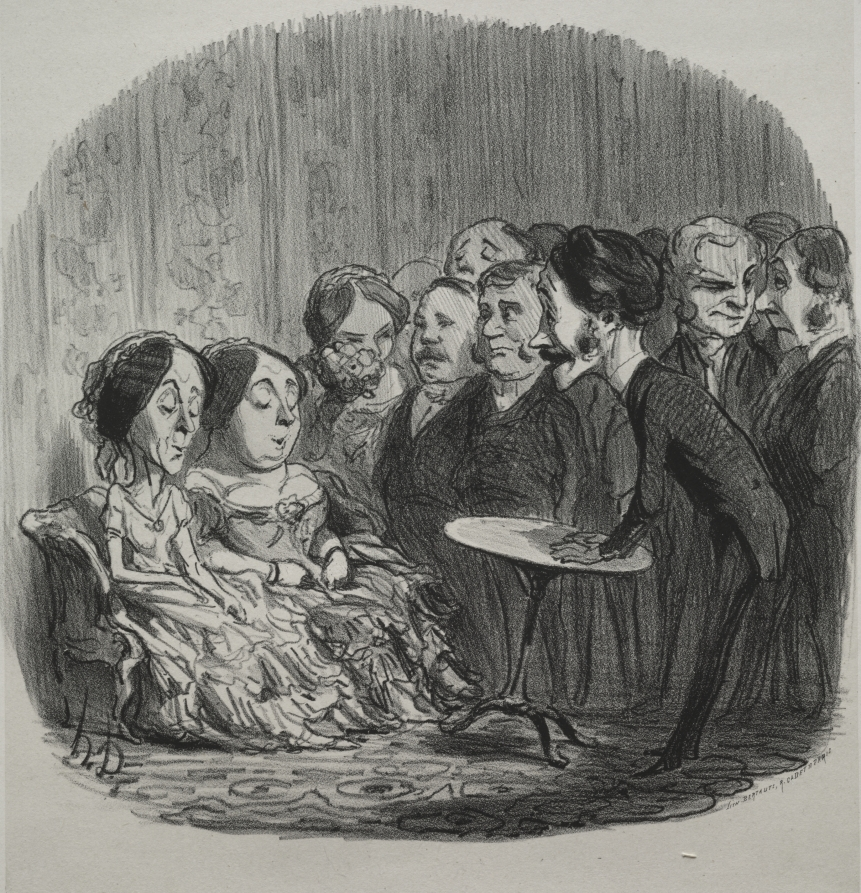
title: Rapping Spirits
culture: France, 19th century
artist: Honoré Daumier (French, 1808–1879)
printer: Bertauts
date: 1851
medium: lithograph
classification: Print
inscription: Upper margin: brown stamp / [in pencil] H.D. D 236 / I ; lower margin, in pencil: L'Esprit Frappeur. / Purple stamp ; lower right, printed: Lith. Bertauts, R. Cadet 11 Paris